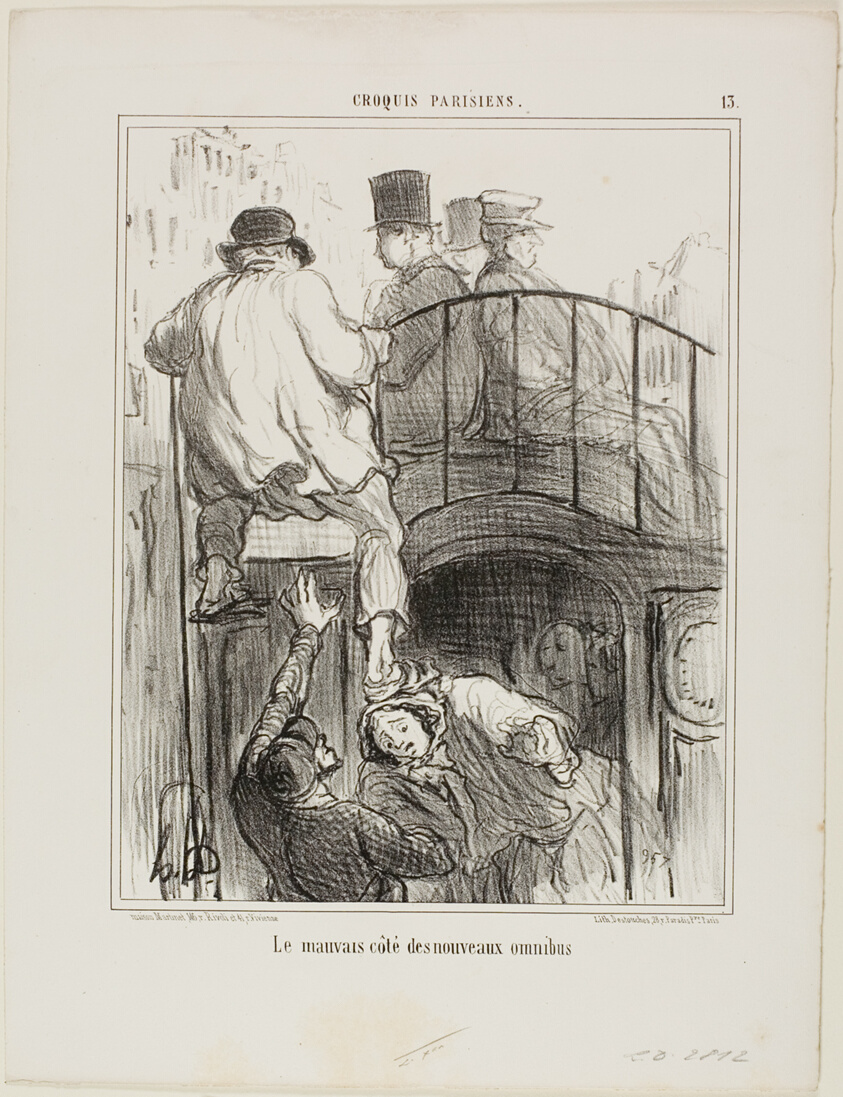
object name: Print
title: An Unpleasant Aspect of the New Type of Omnibus, plate 13 from Croquis Parisiens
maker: Honoré Victorin Daumier; French, 1808-1879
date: 1856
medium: Lithograph on ivory wove paper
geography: France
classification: lithograph; print; prints and drawing